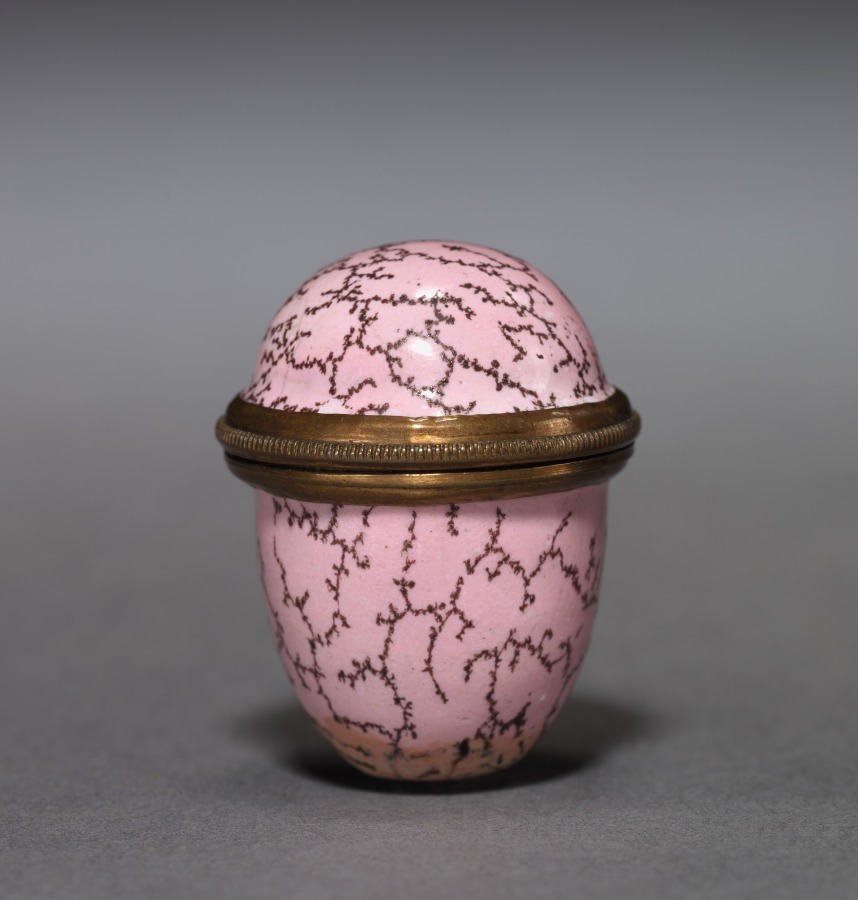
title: Thimble and Container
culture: England, mid-18th century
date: mid-18th century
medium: enamel on metal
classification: Enamel